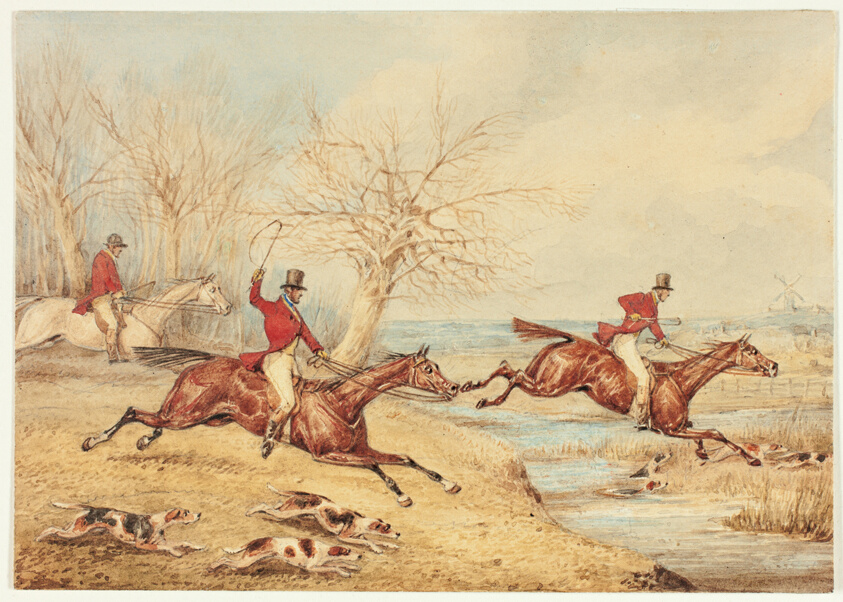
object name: Drawing and Watercolor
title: Mounted Hunters with Dogs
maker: Attributed to Henry Alken; English, 1785-1851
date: 1830/40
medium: Watercolor, over graphite, on cream wove paper, laid down on gray wove paper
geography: England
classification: watercolor; drawings (visual works); prints and drawing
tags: dogs, animals